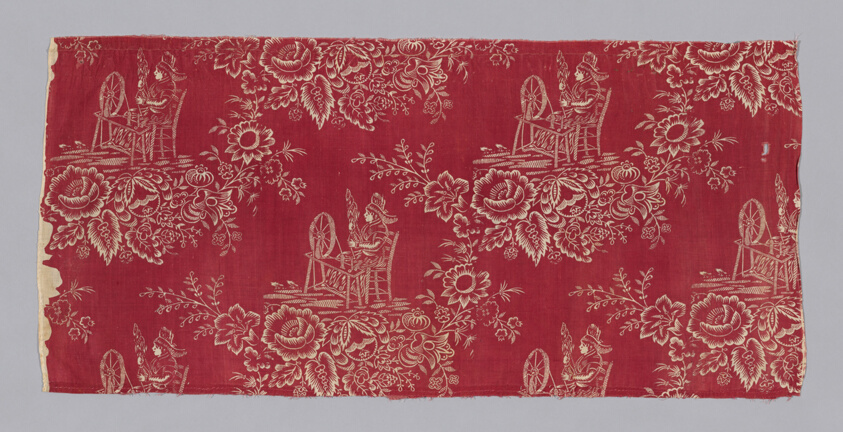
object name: Textile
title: Fragment (Furnishing Fabric)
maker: France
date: c. 1800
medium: Cotton, plain weave; resist printed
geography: France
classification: textile; weaving - printed; furnishing textile